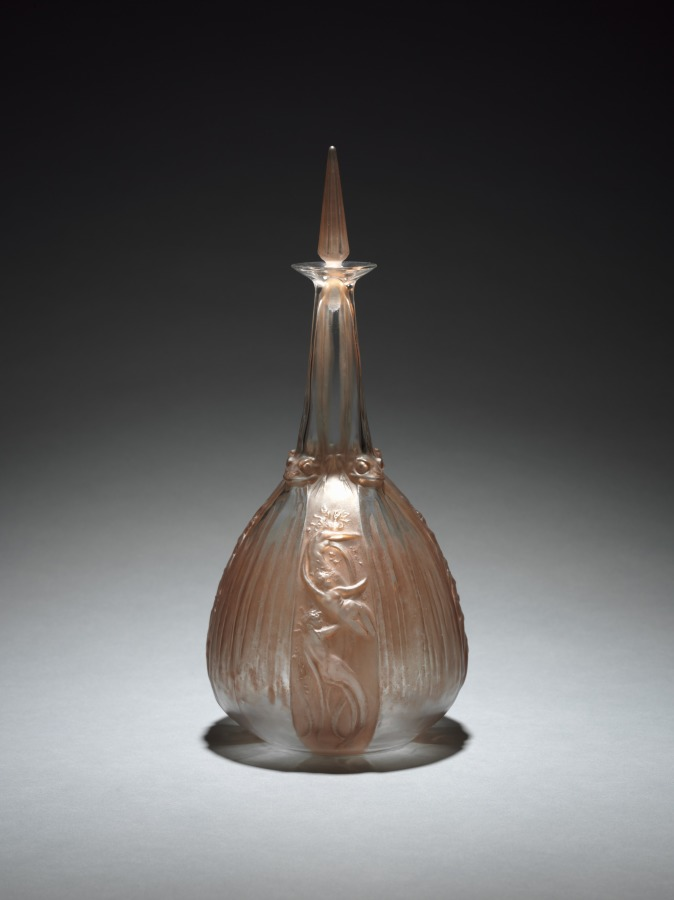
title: Mermaids and Frogs Decanter (Carafe sirènes et grenouilles)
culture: France, 20th century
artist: René Lalique (French, 1860–1945)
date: 1917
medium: glass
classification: Glass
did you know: The title of this work translates to mermaids and frogs carafe.